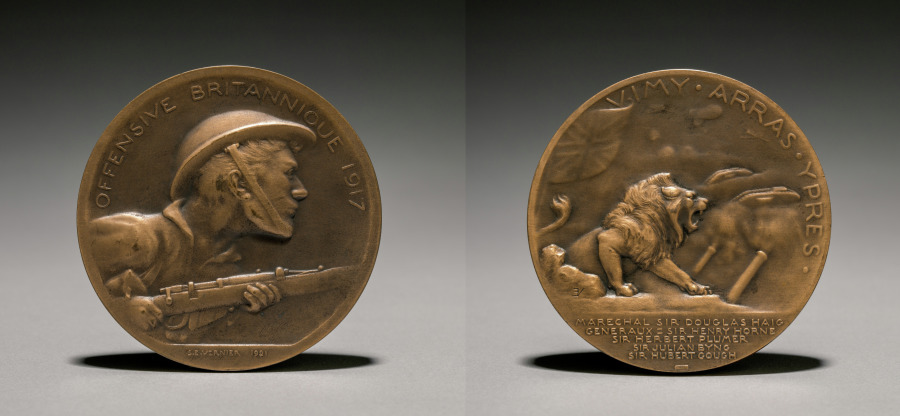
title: Medal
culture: France, early 20th century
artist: Èmile Séraphin Vernier (French, 1852–1927)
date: 1921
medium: bronze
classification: Metalwork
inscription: obverse - "Offensive Brittanique 1917"; signed: "S. E. Vernier, 1921." reverse - "Vimy, Arras, Ypres, Marechal Sir Douglas Haig, Generaux Sir Henry Horne, Sir Herbert Plumer, Sir Julian Byng, Sir Hubert Gough."